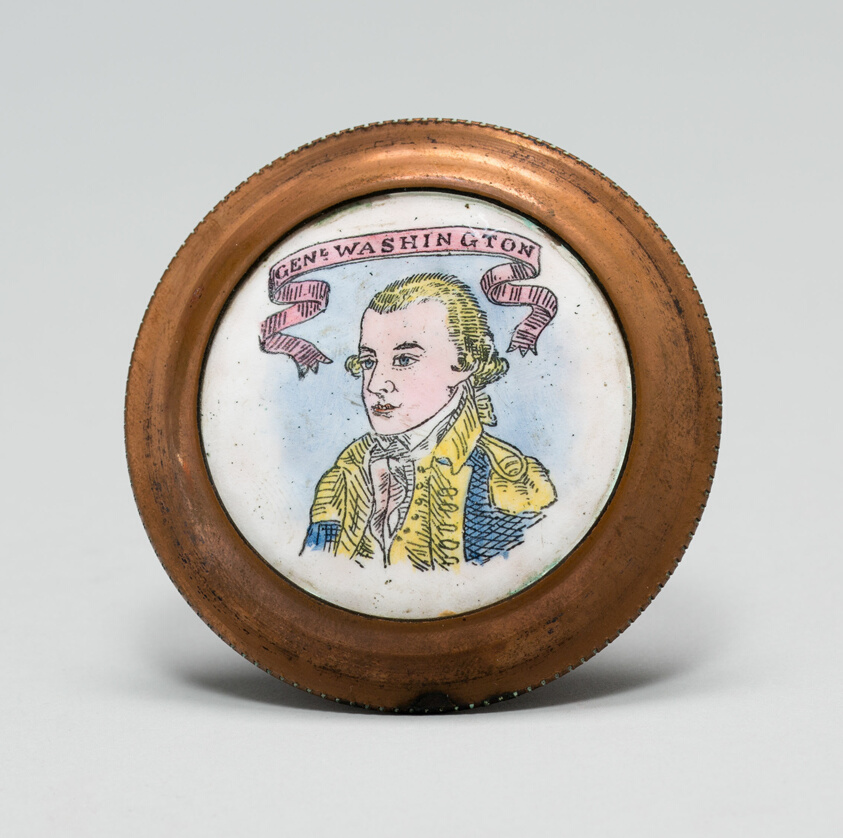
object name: Metalwork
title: Cloak Pin (Knob or Tieback)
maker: Probably Birmingham, England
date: c. 1780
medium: Transfer printed and polychrome enamels on copper, brass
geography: England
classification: costume accessory worn above the waist; metalwork; pin (jewelry); european decorative arts